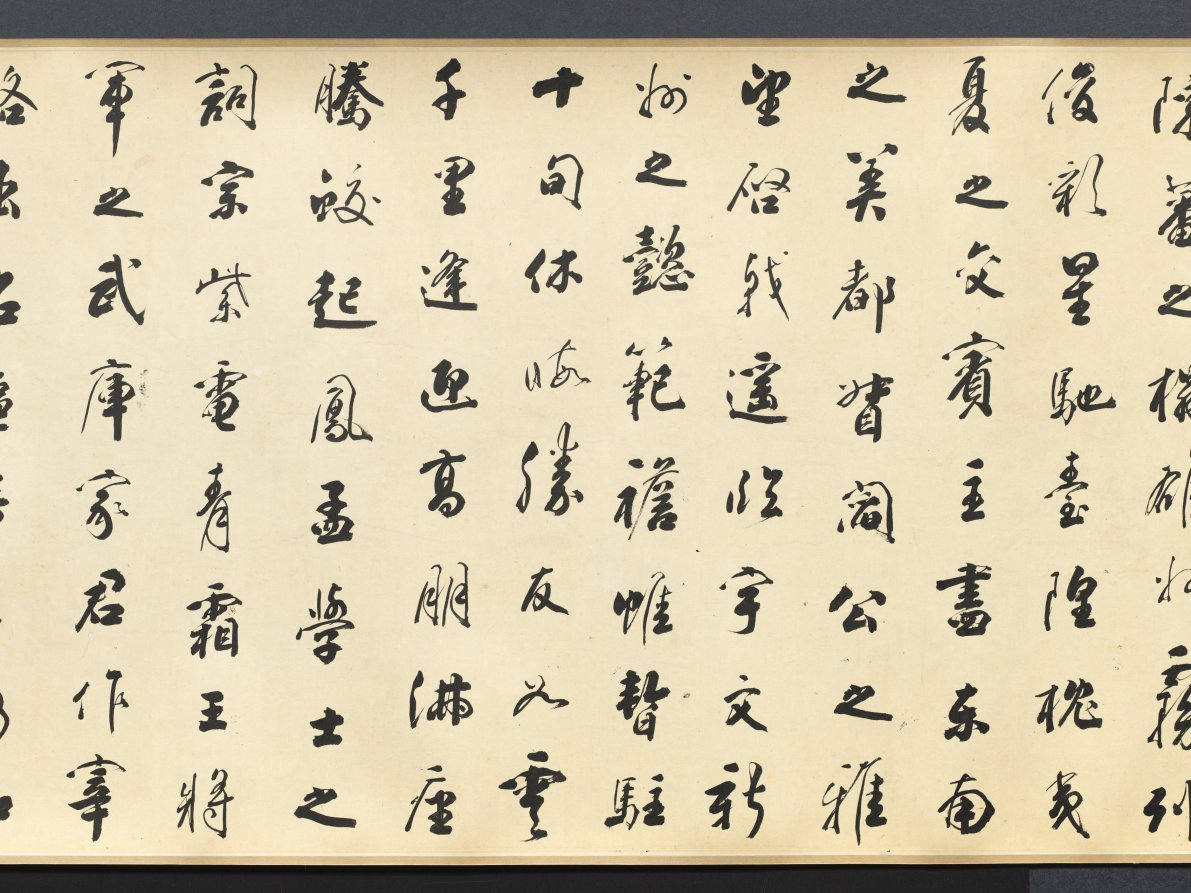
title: Calligraphy in Running Style based on Wang Bo's Essay on Tengwang Pavilion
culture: China, Changbai, Qing dynasty (1644-1911)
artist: Tiebao (Chinese, 1752–1824)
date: 1811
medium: handscroll, ink on paper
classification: Calligraphy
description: A member of the Donggo clan, Tiebao belonged to the Manchu Plain Yellow Banner army. As an official in the Qing court, he endured considerable vicissitude and his career was never smooth. Celebrated as a man of letters, he oversaw the publications of the Manchu military system as well as an anthology of poems by members of the imperial family and other Manchu dignitaries. In calligraphy, he was regarded as the equal of such eighteenth-century luminaries as Liu Yong (1720-1805) and Weng Fanggang (1733-1818). This handscroll is a work of his mature years and is exemplary of his disciplined and highly subtle approach to the art of calligraphy.